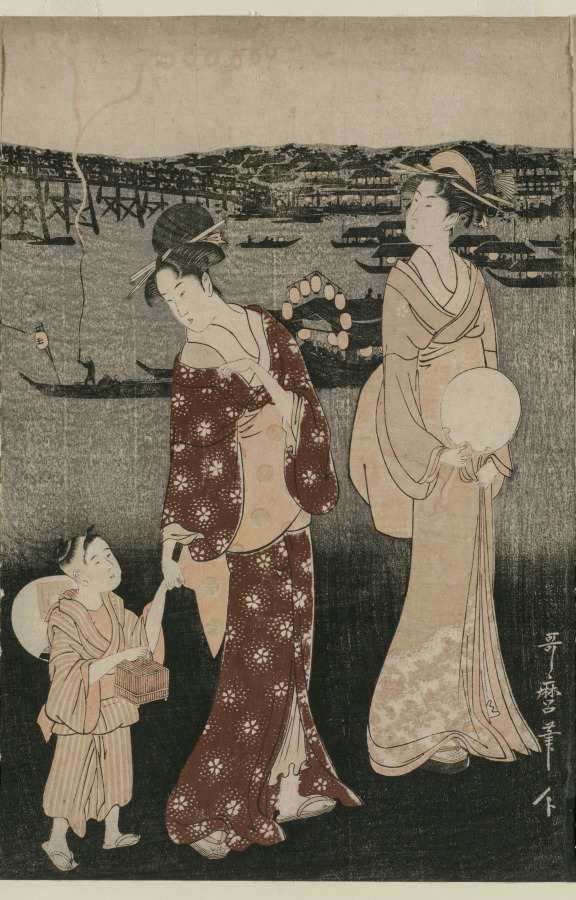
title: Women Enjoying the Evening Cool Near Ryogoku Bridge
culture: Japan, Edo period (1615–1868)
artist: Kitagawa Utamaro (Japanese, c. 1754–1806)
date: c. mid 1790s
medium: color woodblock print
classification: Print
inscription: Artist's signature: Utamaro hitsu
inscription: Publisher: Yamguachiya Chūsuke (emblem)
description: People crowding the Ryōgoku Bridge over the Sumida River and those aboard party boats below enjoy summer fireworks. Among a group gathered on the riverbank a little boy stands holding his caged pet cricket in one hand, and a young woman’s hand in the other.